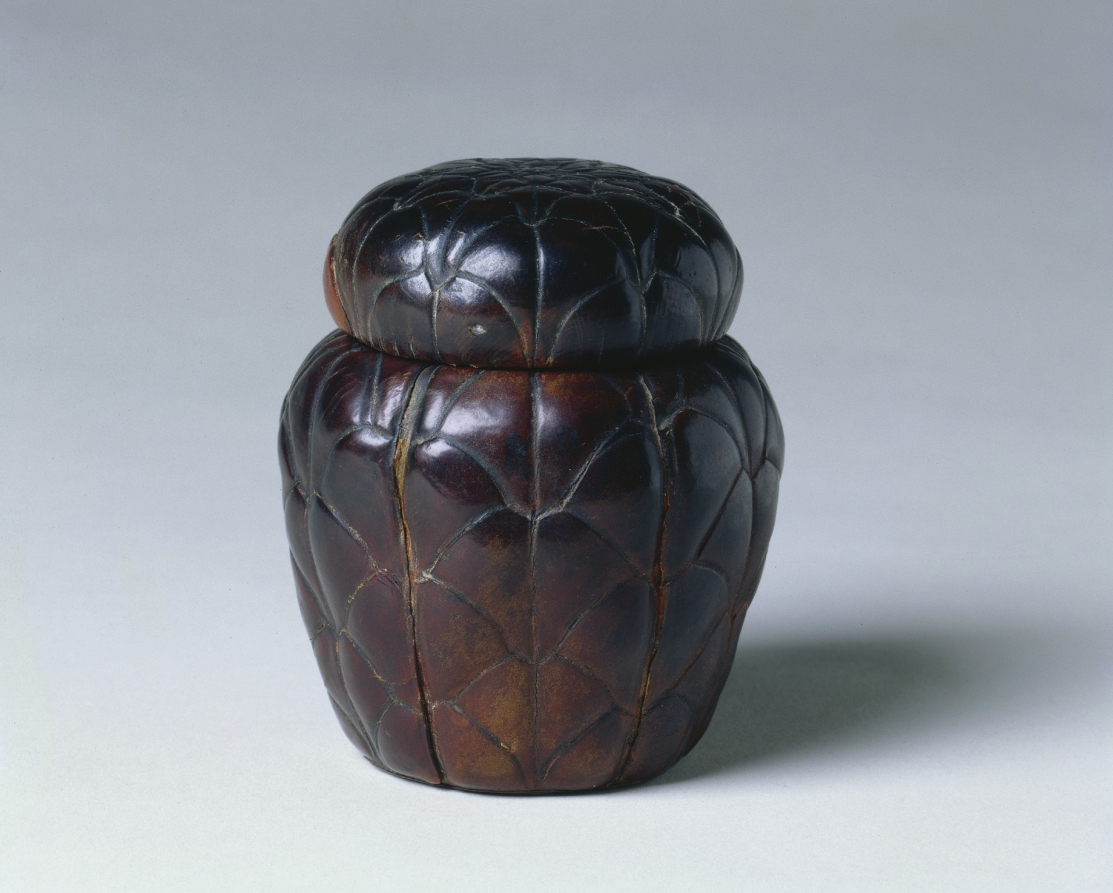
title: Box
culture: France, 20th century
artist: Marguerite de Felice (French, 1872–1933)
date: c. 1908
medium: round wood core covered with tooled leather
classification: Miscellaneous